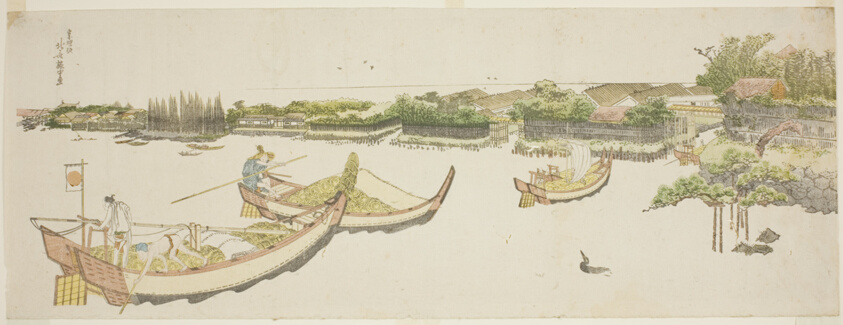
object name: Print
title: Boats transporting rice on the Sumida River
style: Japanese (culture or style)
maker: Katsushika Hokusai 葛飾 北斎; Japanese, 1760-1849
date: c. 1800/05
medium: Color woodblock print; nagaban, surimono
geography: Japan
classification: woodblock print; print; asian art